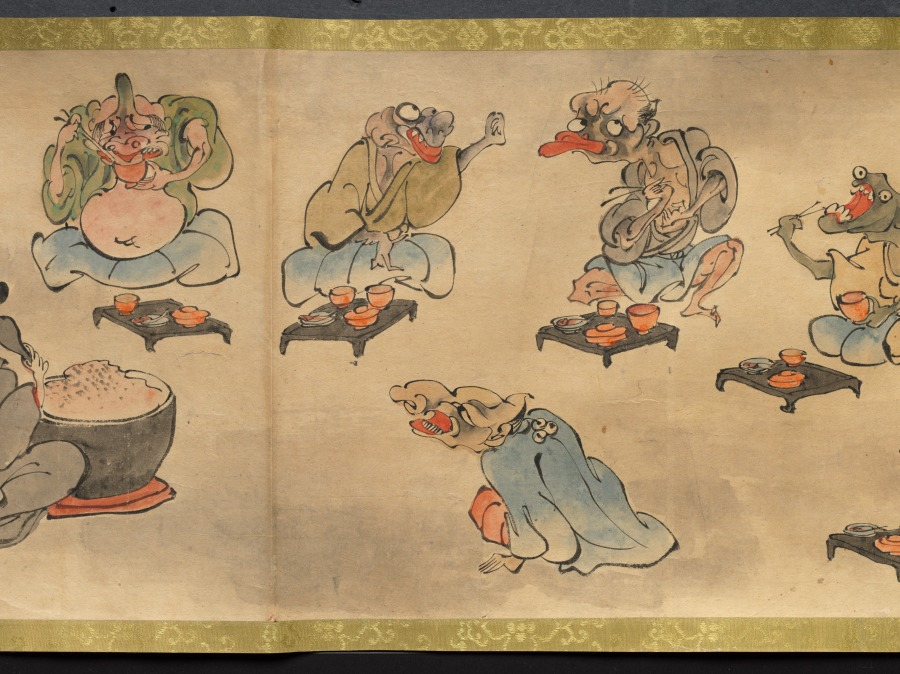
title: An Illustrated Marriage of Apparitions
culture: Japan, Edo period (1615–1868)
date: mid-1800s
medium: handscroll; ink and color on paper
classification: Painting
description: The matchmaking, engagement, wedding, and birth of the first child of two apparitions, or bakemono, literally "things that change," are illustrated in this whimsical, humorous handscroll. Japanese folklore abounds with such strange creatures, most famously represented in handscrolls featuring a procession of 100 supernatural monsters. Aside from a textual preface and cartouches indicating the content of the scenes, the tale is told visually. The artist and whereabouts of the original handscroll are unknown, but a number of other 19th-century copies by amateur painters exist in Japanese collections, attesting to its broad appeal.